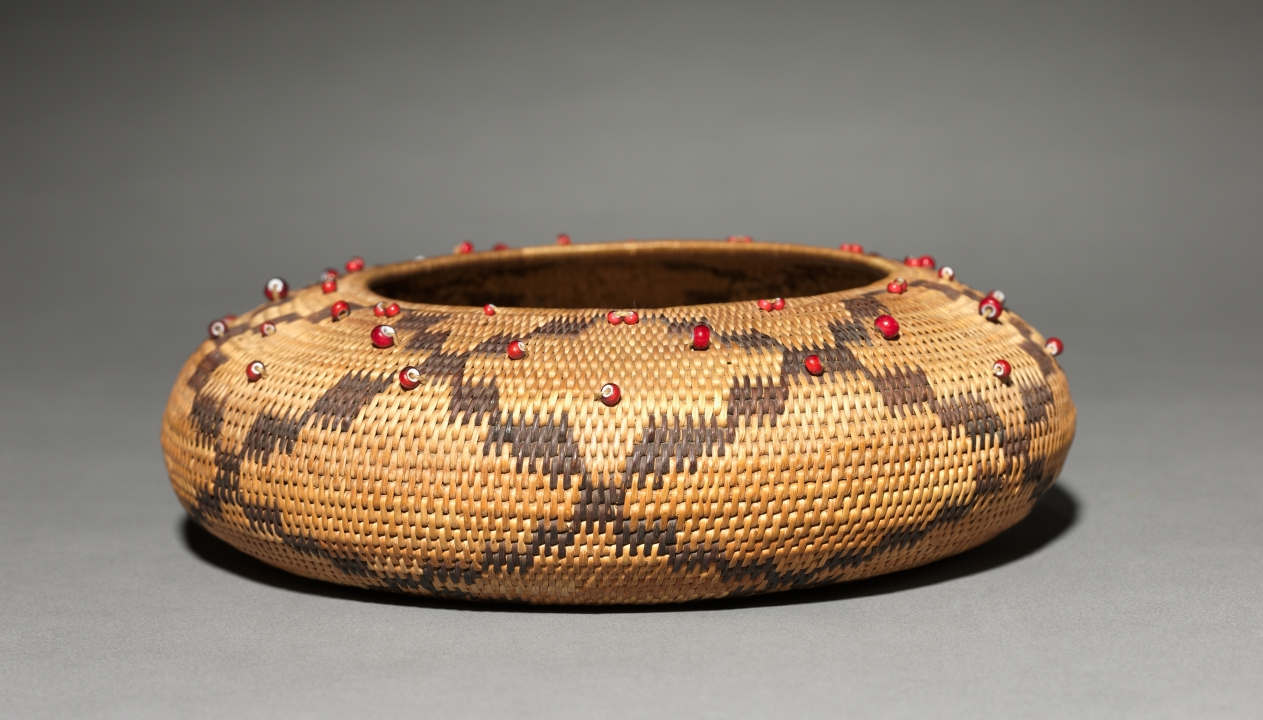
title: Trinket Bowl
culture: California, Pomo, Late 19th- Early 20th century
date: c. 1895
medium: Bulrush, Sedge, with beads; coiled (1 rod)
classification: Basketry